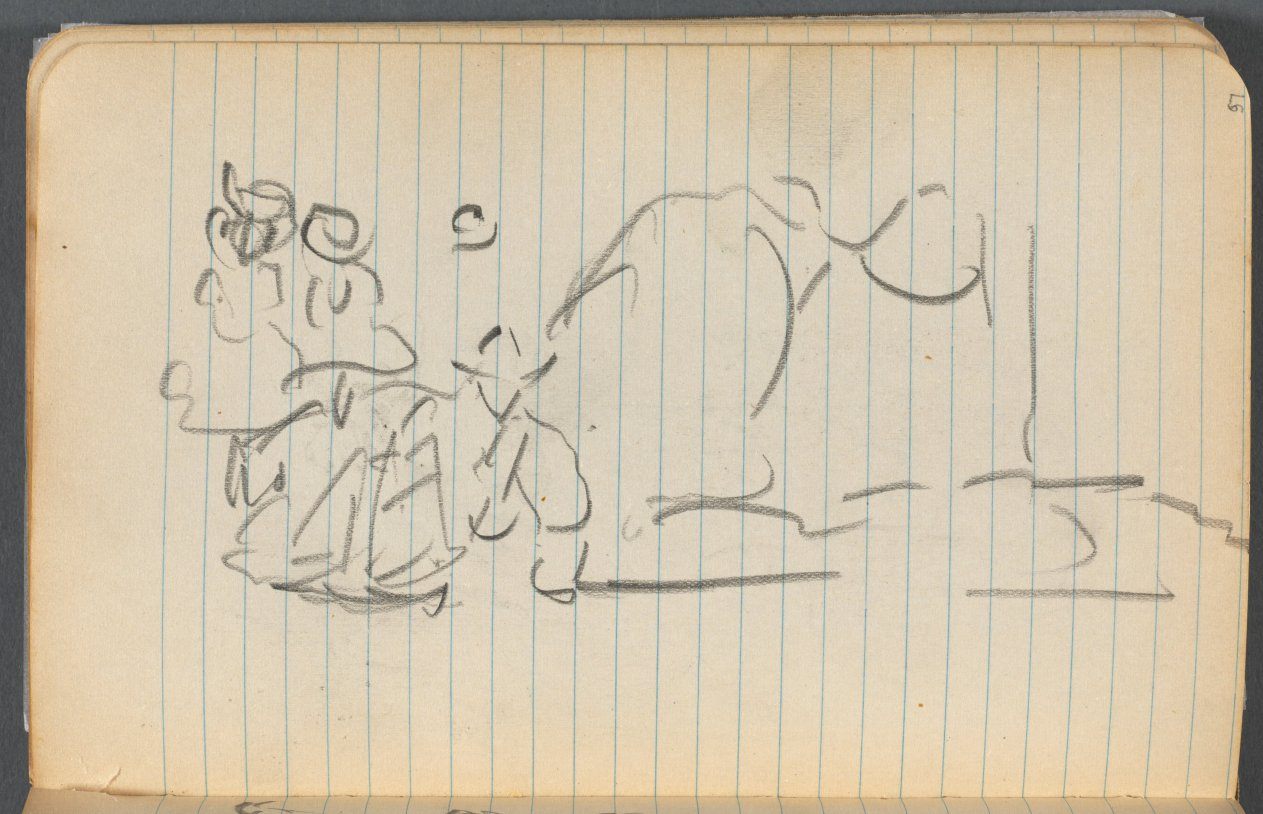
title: Sketchbook, page 097: Figures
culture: America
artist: Maurice Prendergast (American, born Newfoundland [now Canada], 1858–1924)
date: 1905–10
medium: graphite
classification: Bound Volume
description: This sketchbook contains 69 pages of drawings, a diary largely devoted to the state of the artist's health, and a three-page discourse on the nature of genius and ideas.